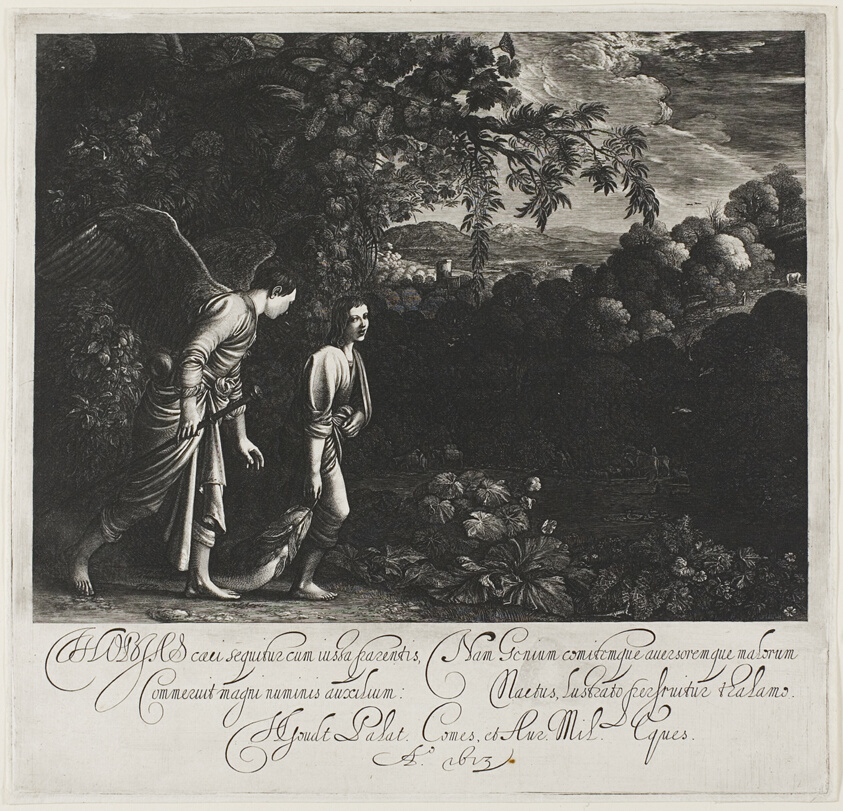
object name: Print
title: Tobias and the Angel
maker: Hendrik Goudt (Dutch, 1583-1648); after Adam Elsheimer (German, 1578-1610)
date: 1613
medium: Engraving in black on ivory laid paper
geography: Netherlands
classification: etching; print; prints and drawing